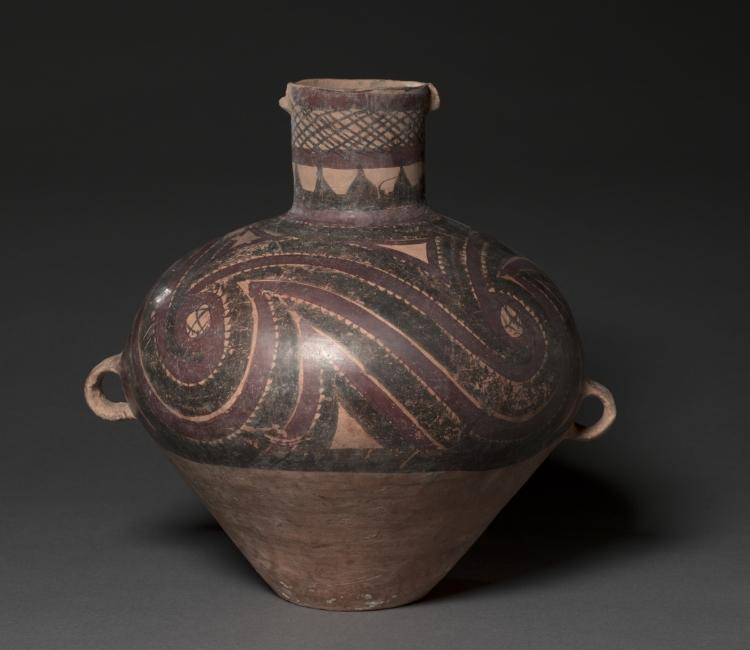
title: Jar with Curvilinear Designs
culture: Northwest China, Neolithic period, Majiayao culture, Banshan phase (2650–2350 BCE)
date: 2650–2350 BCE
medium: earthenware with slip-painted decoration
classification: Ceramic